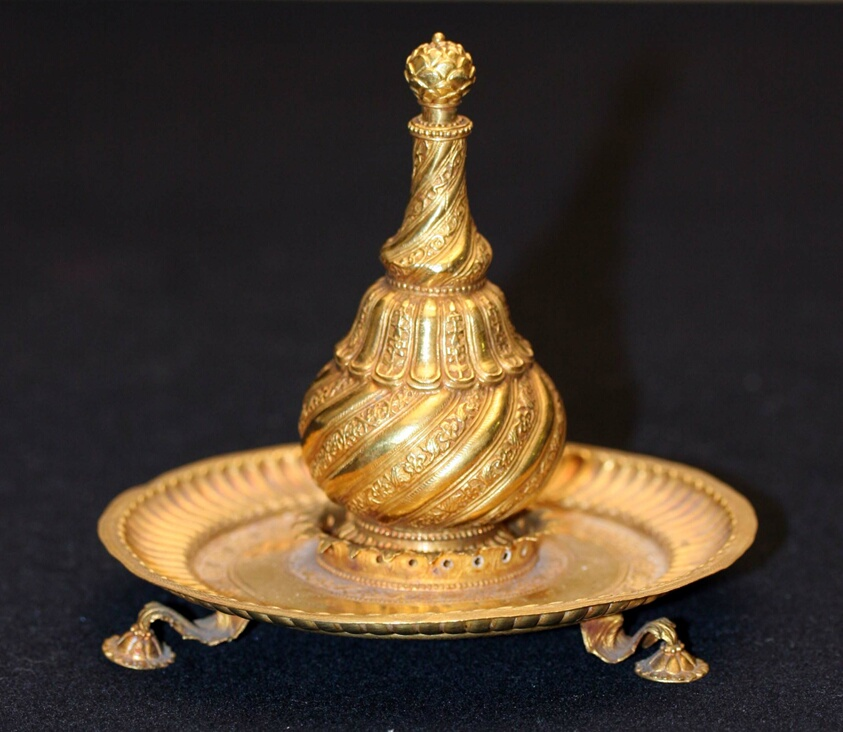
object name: Decorative Arts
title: Perfume Bottle (Attardan) and Tray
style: South Asian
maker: India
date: 18th/19th century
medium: Gold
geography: India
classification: metal; metalwork; asian art; decorative arts